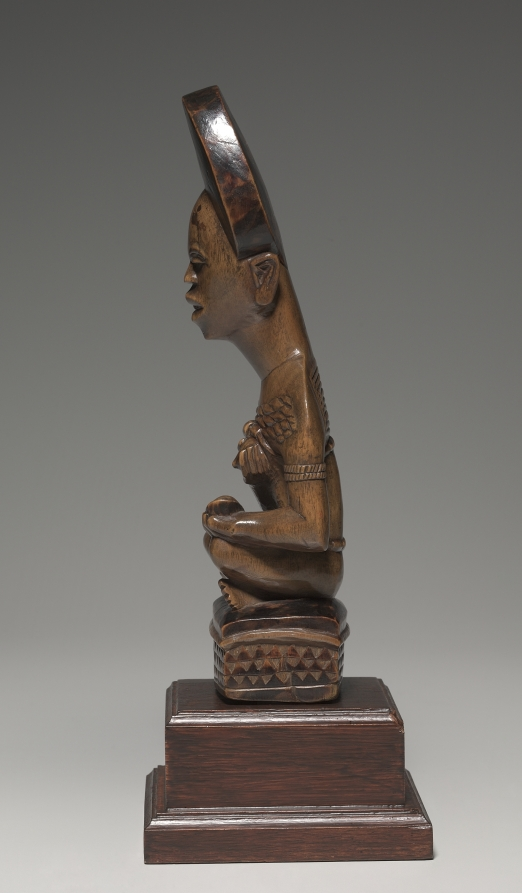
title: Woman and Child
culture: Africa, Central Africa, Democratic Republic of Congo, Yombe-style carver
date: mid- to late 1800s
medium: Wood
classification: Sculpture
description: This mother-and-child figure was probably part of a cult concerned with the treatment of infertility. Both her jewelry and her seated pose indicate that the woman occupied a high rank in her community. Her miter-shaped hairstyle, chiseled teeth, and raised body scars--considered to be marks of beauty and perfection--signal that the woman incarnates the founding ancestor of a kinship group.